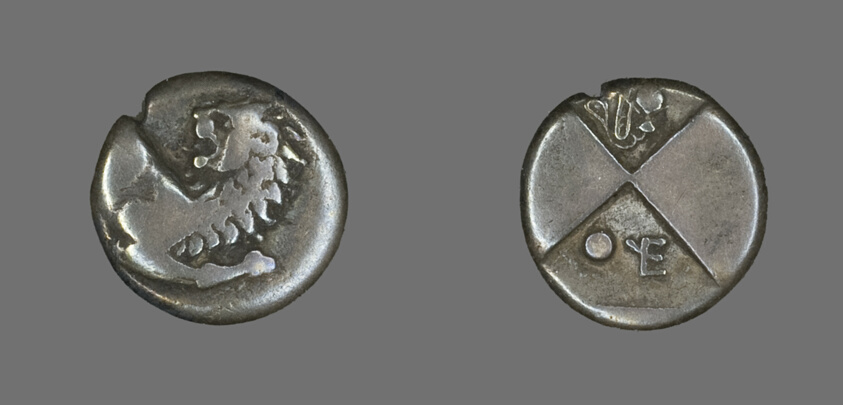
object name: Coin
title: Hemidrachm (Coin) Depicting a Lion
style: greek, ancient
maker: Greek; minted in Chersonesus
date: late 5th century BCE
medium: Silver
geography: Roman Empire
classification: coin; ancient art